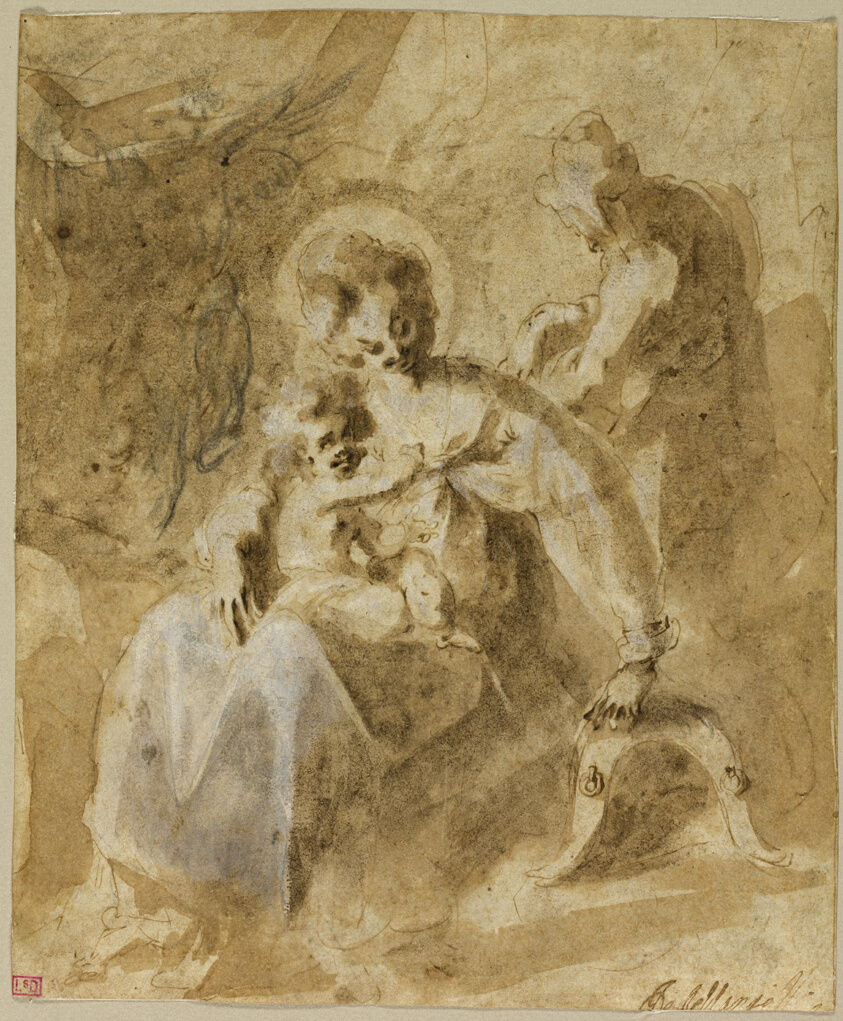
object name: Drawing and Watercolor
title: The Holy Family Resting on the Flight into Egypt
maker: Jacques Bellange (French, c. 1575-1616)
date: 1610/17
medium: Pen and brown ink and brush and brown wash, with charcoal, heightened with white gouache, over black chalk, on cream laid paper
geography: France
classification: pen and ink drawings; drawings (visual works); prints and drawing